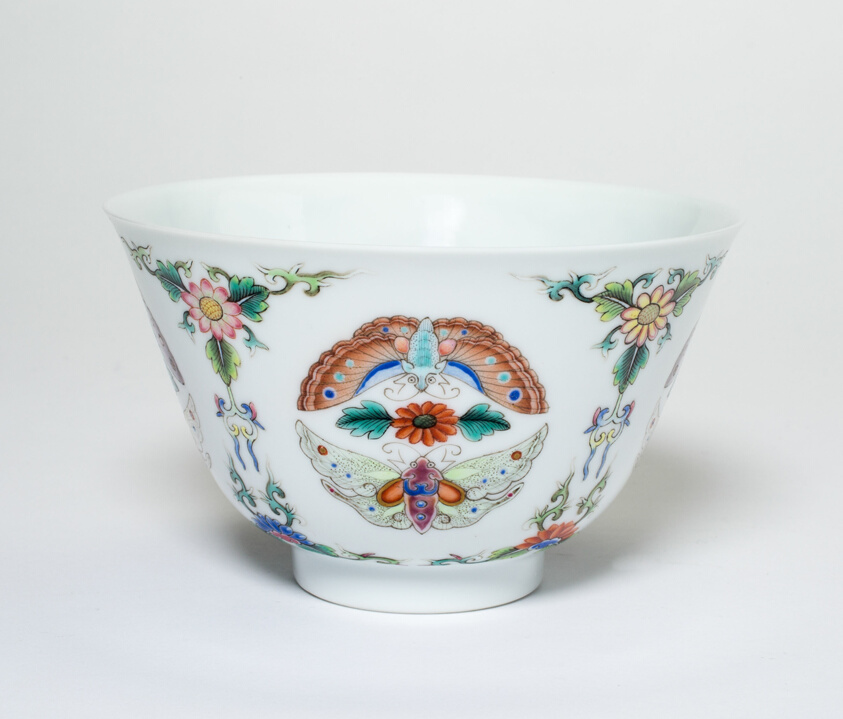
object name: Vessel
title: Cup with Floral Scrolls and Moths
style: Chinese (culture or style)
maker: China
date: Qing dynasty (1644–1911), Qianlong reign mark and period (1736–1795), late 18th century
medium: Porcelain painted in overglaze famille rose enamels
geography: China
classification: drinking vessel; ceramics; vessel